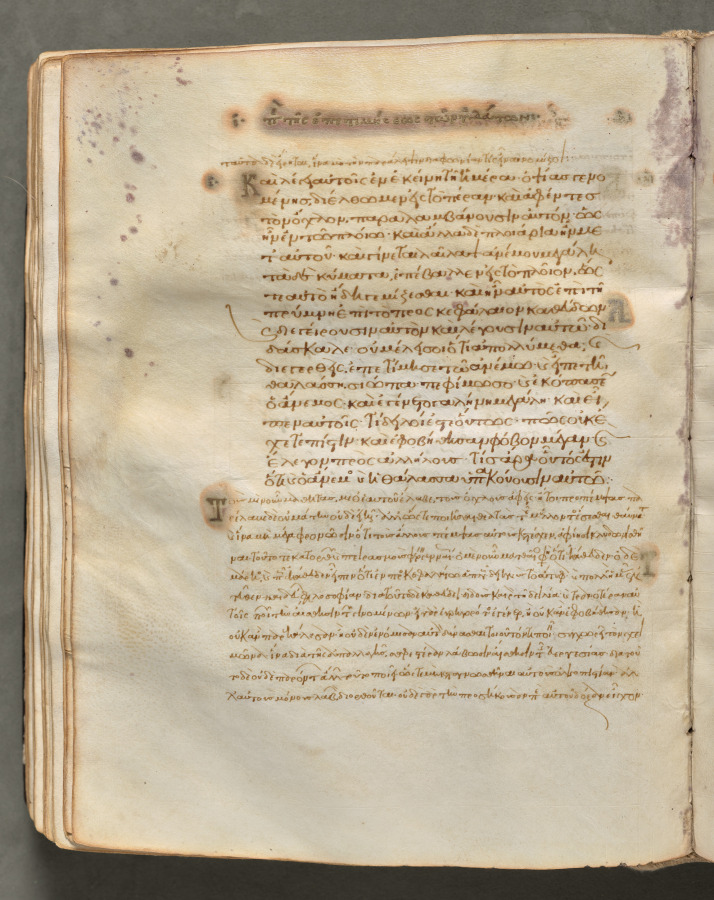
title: Text, folio 146 (verso), from a Gospel Book with Commentaries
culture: Byzantium, Constantinople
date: c. 1000–1100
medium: ink, tempera, and gold on vellum; leather binding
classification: Bound Volume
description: Each of the four gospels in this book opens on a page with brilliantly illuminated borders depicting the author of the text as well as birds-principally peacocks, symbols of the immortality of the soul-and fountains, representing the fountain of life and the salvation of the soul. This volume consists of 428 leaves with texts in Greek. Its level of sophistication suggests that it was probably written and decorated in a monastery in Constantinople.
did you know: Gospel Books were carried in procession through Byzantine churches.